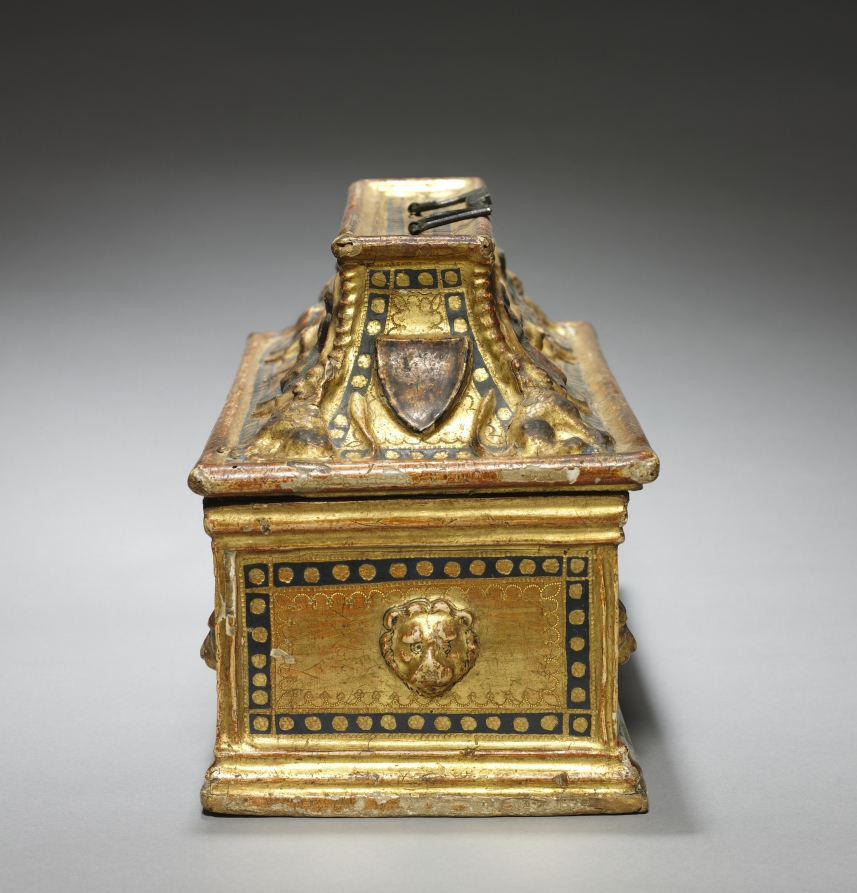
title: Casket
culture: Italy, Siena(?)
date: late 1300s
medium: painted and gilded gesso on wood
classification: Furniture and woodwork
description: This casket is one of only a few of its kind to survive in such a fine state of preservation. A variety of such caskets were used in wealthy homes to store jewelry, seals, mirrors, and combs. A keyhole lock is provided for security. Caskets like this were often highly decorated and given to women as gifts.